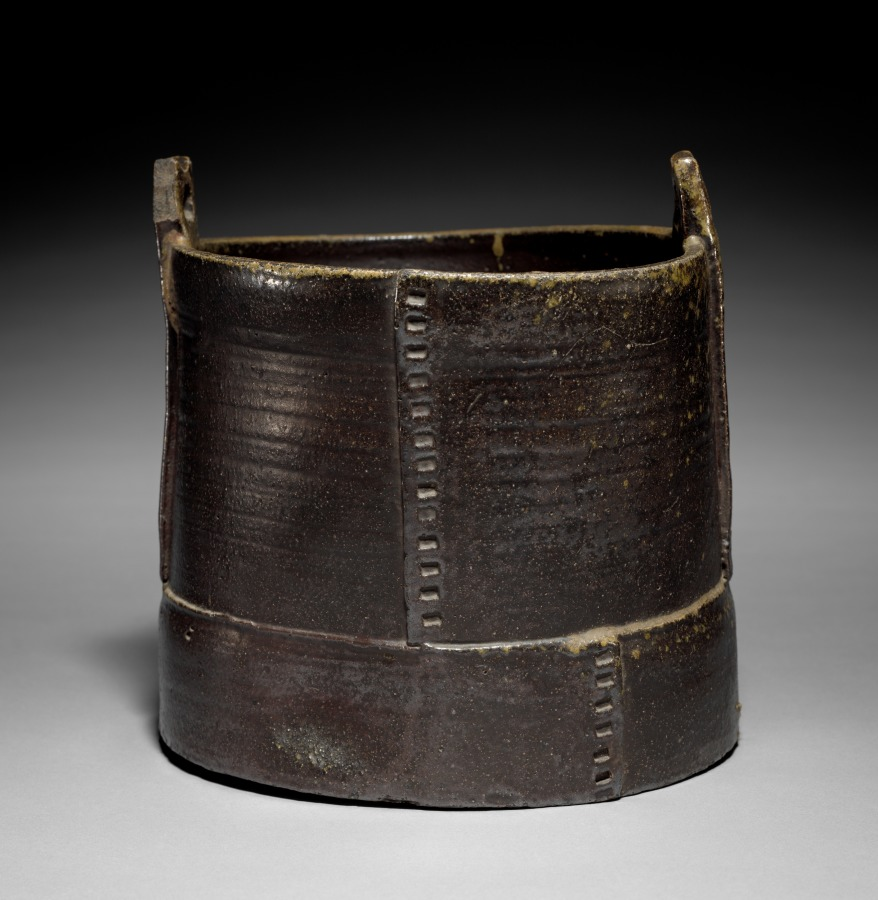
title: Water Container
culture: Japan, Momoyama period (1573–1615)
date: early 1600s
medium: glazed stoneware (Bizen ware, Imbe type)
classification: Ceramic